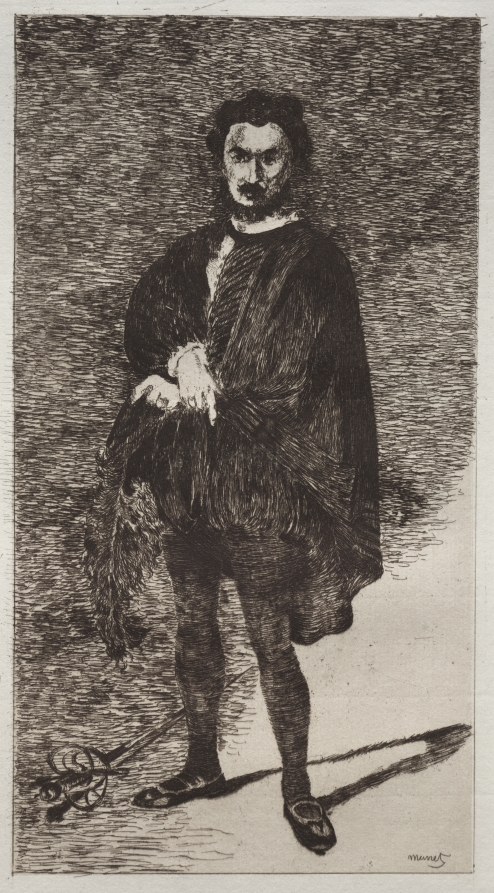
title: The Tragic Actor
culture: France, 19th century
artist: Édouard Manet (French, 1832–1883)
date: 1866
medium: etching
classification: Print